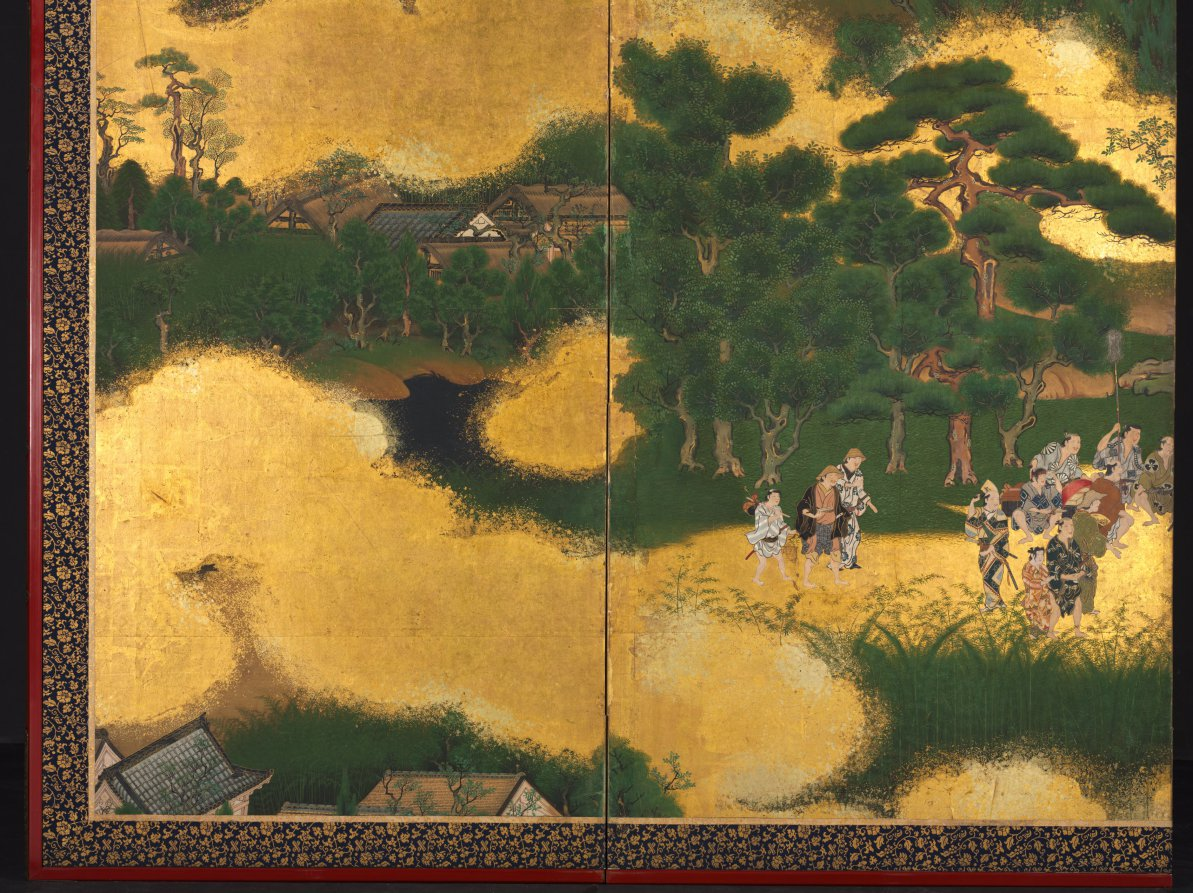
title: Horse Race at the Kamo Shrine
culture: Japan, Edo period (1615–1868)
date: early to mid-1600s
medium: One of a pair of six-panel folding screens; ink and color on gilded paper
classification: Painting